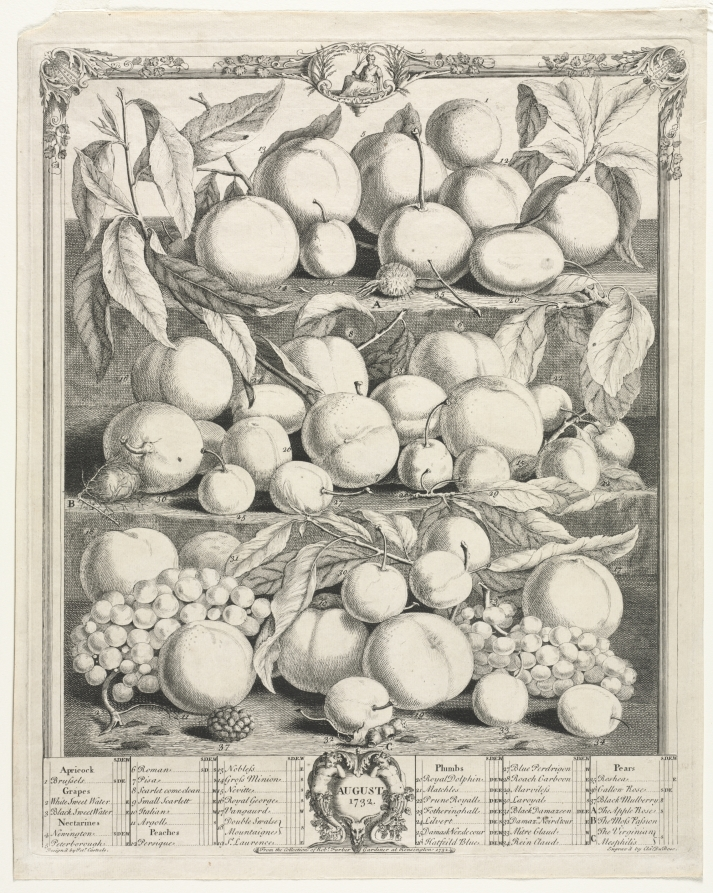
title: Twelve Months of Fruit: August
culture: England, 18th century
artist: Henry Fletcher (British, active 1715–38)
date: 1732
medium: engraving, hand-colored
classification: Print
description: Robert Furber, one of the best-known plant dealers in London, published Twelve Months of Flowers and Twelve Months of Fruit in 1730 and 1732, respectively. These deluxe sales catalogues, the first ever produced in England, display some 400 flowers and 370 fruits arranged according to the months in which the flowers and fruit bloom or ripen. At least two dozen American plants are pictured, as the flora of the colonies quickly became available in Europe.